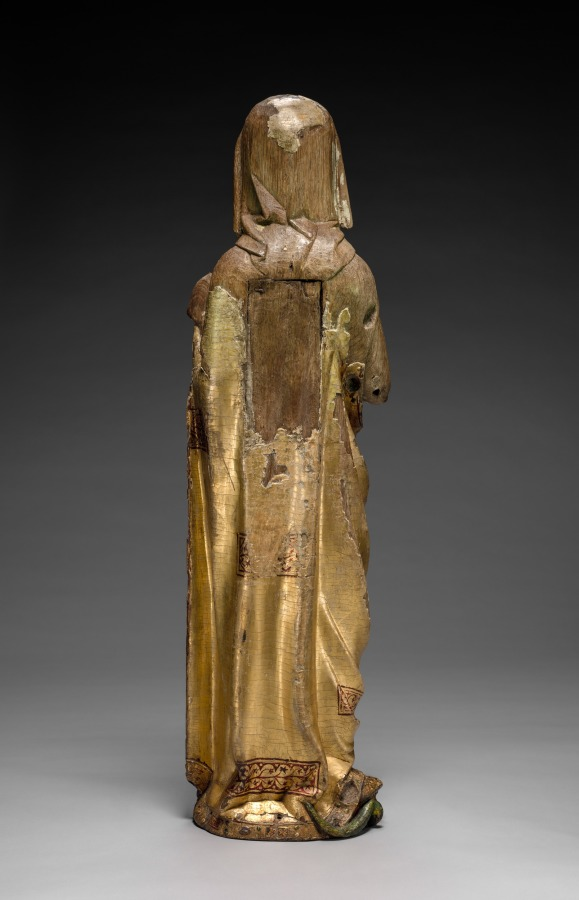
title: Virgin and Child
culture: Mosan (Valley of the Meuse), Liège(?), late 13th century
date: late 1200s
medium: wood (oak) with polychromy and gilding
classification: Sculpture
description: This sculpture is a rare survival in wood from the valley of the Meuse River (modern Belgium and Holland), an important region for the production of ecclesiastical art in the 1100s and 1200s. The elegantly draped figure is remarkable for the preservation of much of its original paint and gilding, including the Virgin's gilded mantle highlighted with decorative bands of geometric patterns and the green dragon on which she stands. There are small settings around the Virgin's neck and along the border of the mantle that would have originally been set with gem and glass cabochons in imitation of the richly adorned metalwork for which Mosan art was highly esteemed. The settings for these cabochons provide some hint of the original opulence of this sculpture. The Virgin's serene features and beautiful countenance are noteworthy, as is the refined execution of the draperies.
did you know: Dragons, like the one Mary is standing on, sometimes look more like snakes in medieval art.